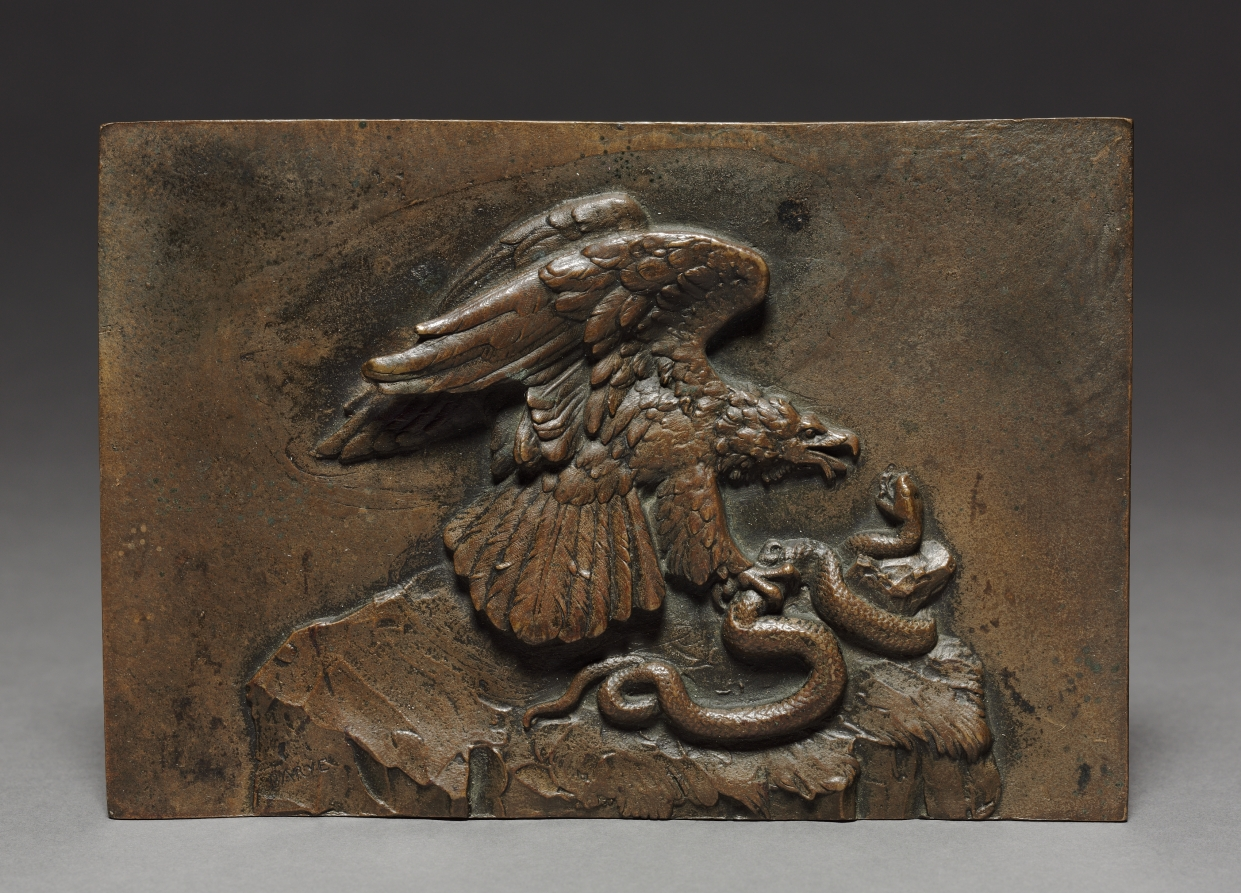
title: Plaque: Eagle with Snake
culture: France, 19th century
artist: Antoine-Louis Barye (French, 1796–1875)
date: c.1830 – 1875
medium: bronze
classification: Sculpture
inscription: Signed lower left: "Barye"